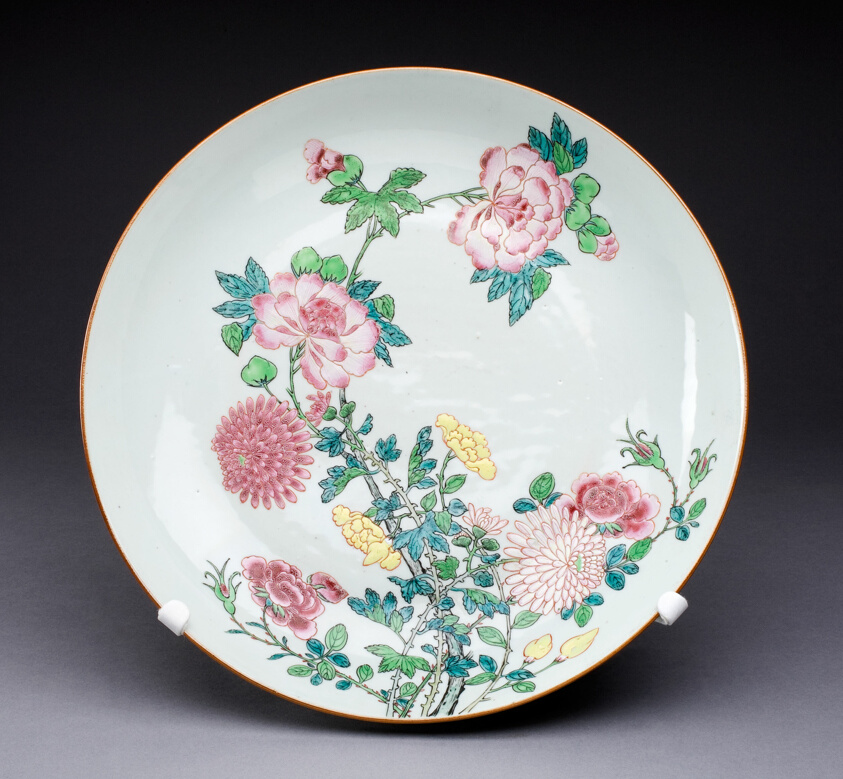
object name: Ceramics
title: Dish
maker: China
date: c. 1725, Qing Dynasty (1644–1911), Yongzhen period (1723–1735)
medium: Hard-paste porcelain and polychrome enamels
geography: China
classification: dish (vessel); ceramics